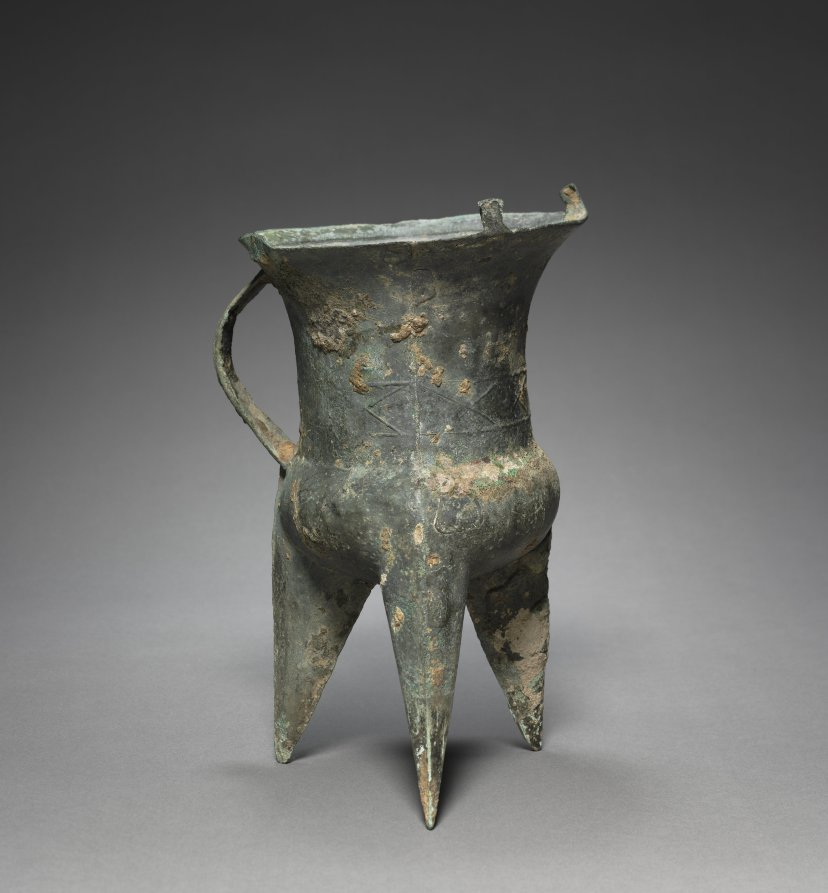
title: Wine Vessel (Jia)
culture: China, probably Henan province, Erlitou culture (c. 1900–1500 BCE)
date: c. 1700–1500 BCE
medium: bronze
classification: Metalwork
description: This wine-warming vessel, known as jia, is the earliest example of a Chinese bronze vessel in the museum collection. It reveals an already sophisticated bronze casting technology that would serve as the foundation for the later vigorous artistic developments of the Shang civilization. The use of bronze was a major turning point of the Chinese civilization. Bronze metallurgy flourished alongside other major developments in ancient China including cities, specialized craftsmanship, stratified social classes, and the invention of writing.